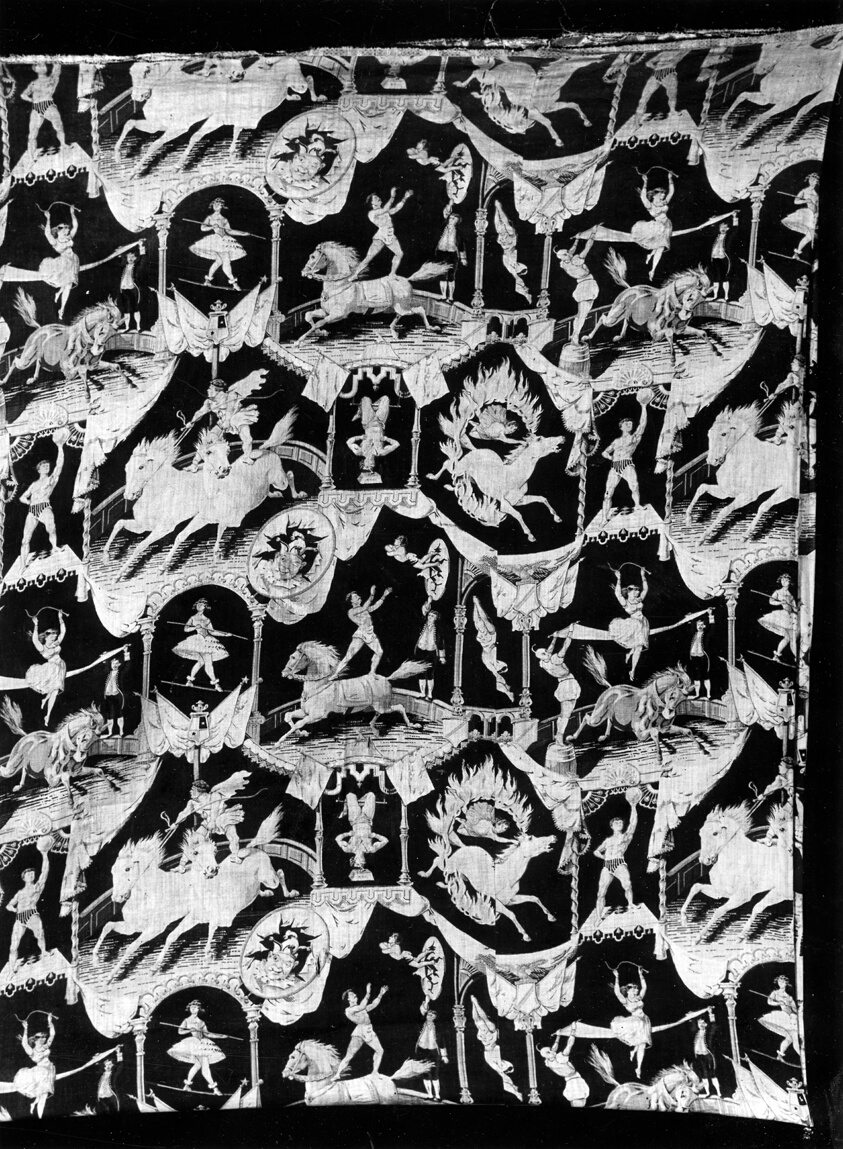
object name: Textile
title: Circus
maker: United States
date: c. 1876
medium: Cotton, plain weave; printed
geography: United States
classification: textile; weaving - printed